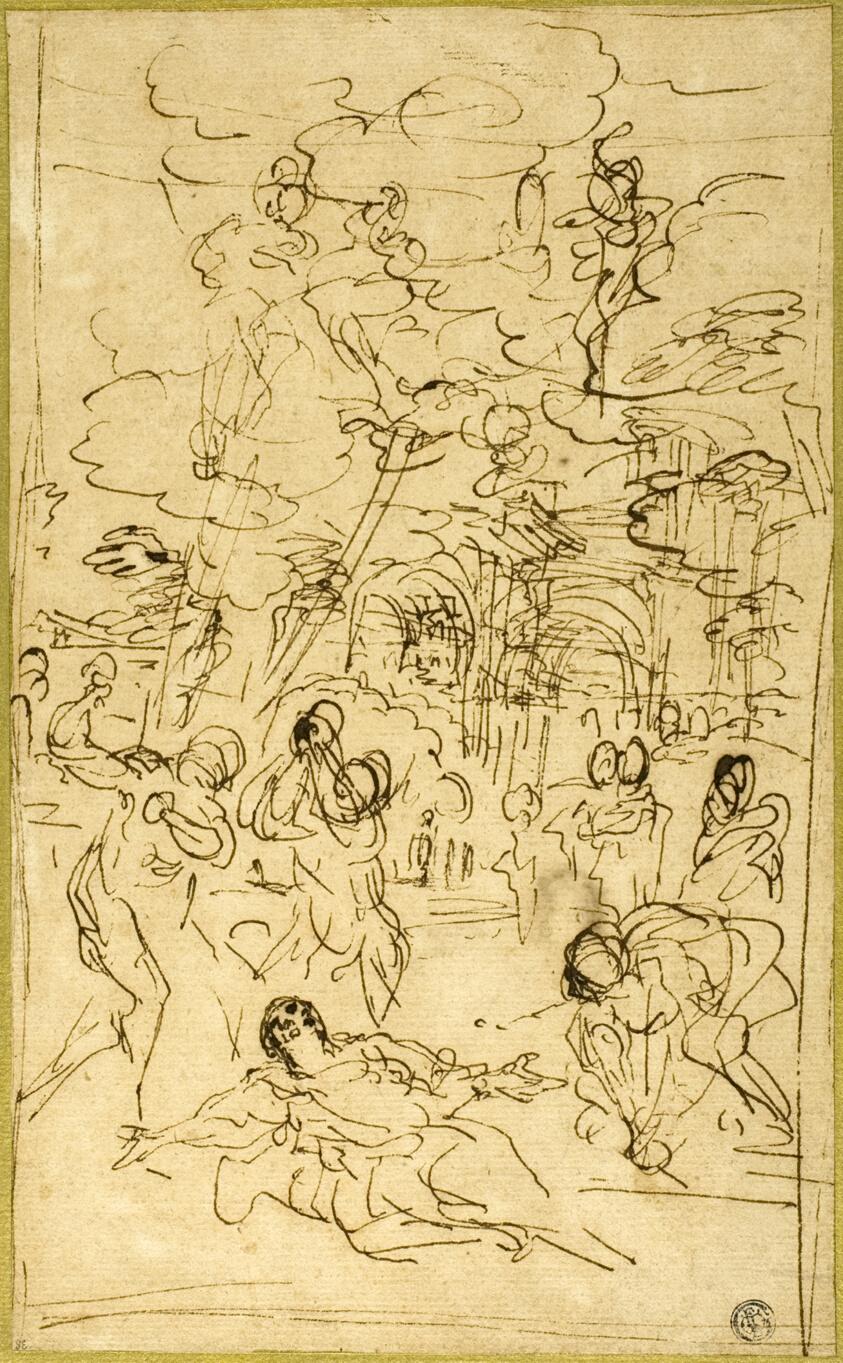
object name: Drawing and Watercolor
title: The Martyrdom of Saint Stephen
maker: Pietro da Cortona (Italian, 1596-1669)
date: c. 1660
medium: Pen and brown ink, on tan laid paper, laid down on cream laid card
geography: Italy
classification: pen and ink drawings; drawings (visual works); prints and drawing